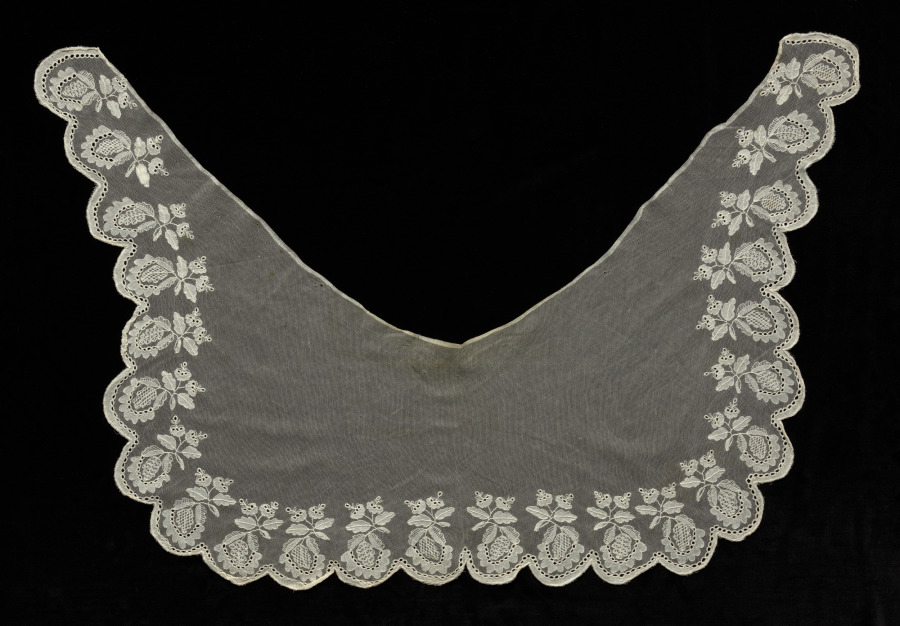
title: Lace Collar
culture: Spain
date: 1800s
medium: Machine-made net lace with cotton embroidery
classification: Lace